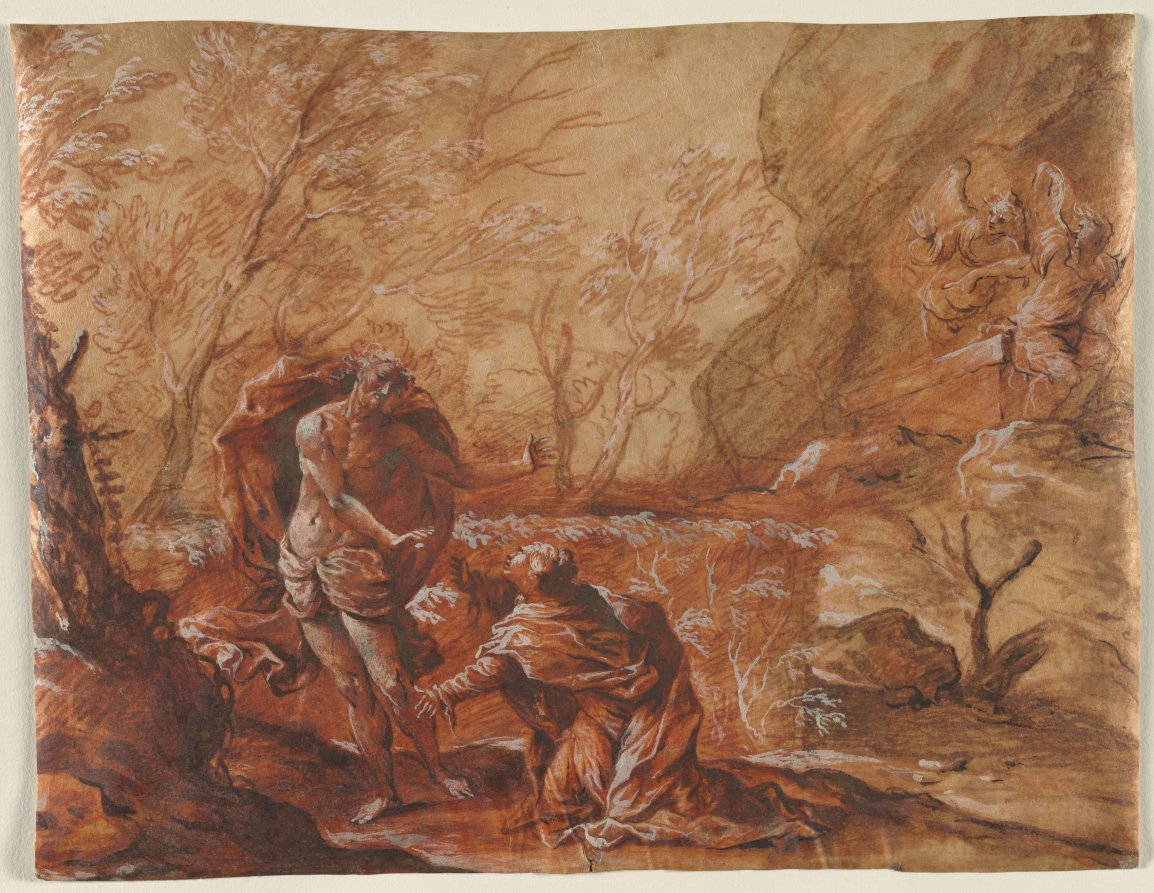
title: Noli Me Tangere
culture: Italy, 17th century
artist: Anonymous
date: 1600s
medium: red chalk, brush and brown chalk wash, brush and brown ink, with brush and red chalk wash and red paint, heightened with white gouache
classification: Drawing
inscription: VERSO, upper center, in black ink: 28 ; center right, in graphite: 100- ; lower left, in graphite: 273